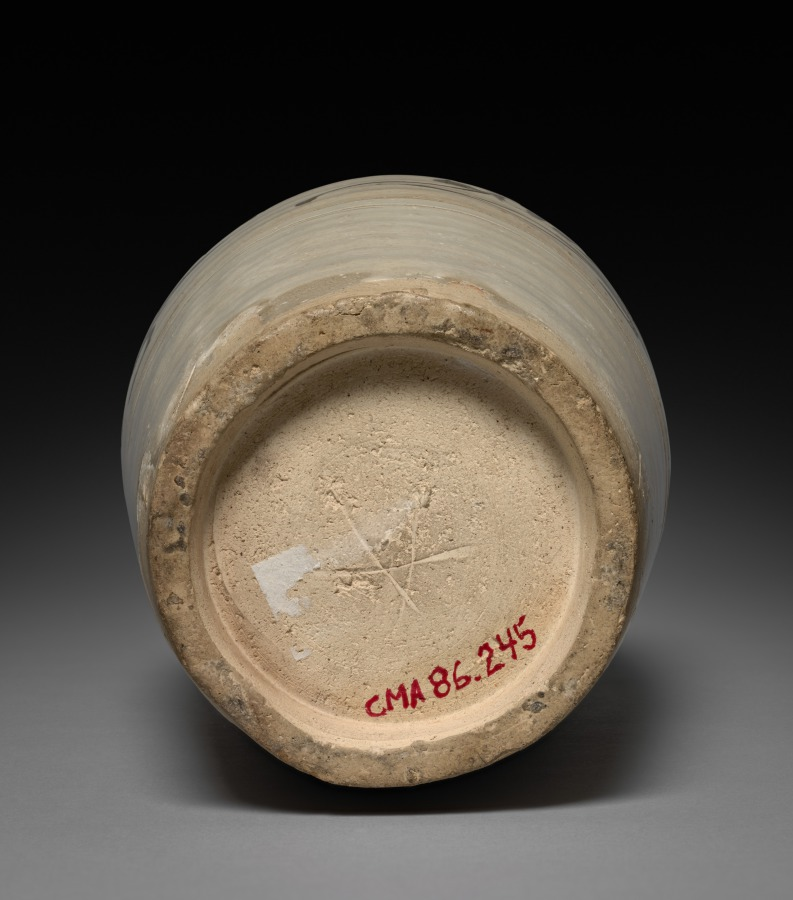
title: Meiping (Plum Blossom) Vase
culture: China, Northern Song dynasty (960-1127) - Jin dynasty (1115-1234)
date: 1100s–1200s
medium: Buff stoneware, slip coated with painted underglaze decoration, Cizhou ware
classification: Ceramic